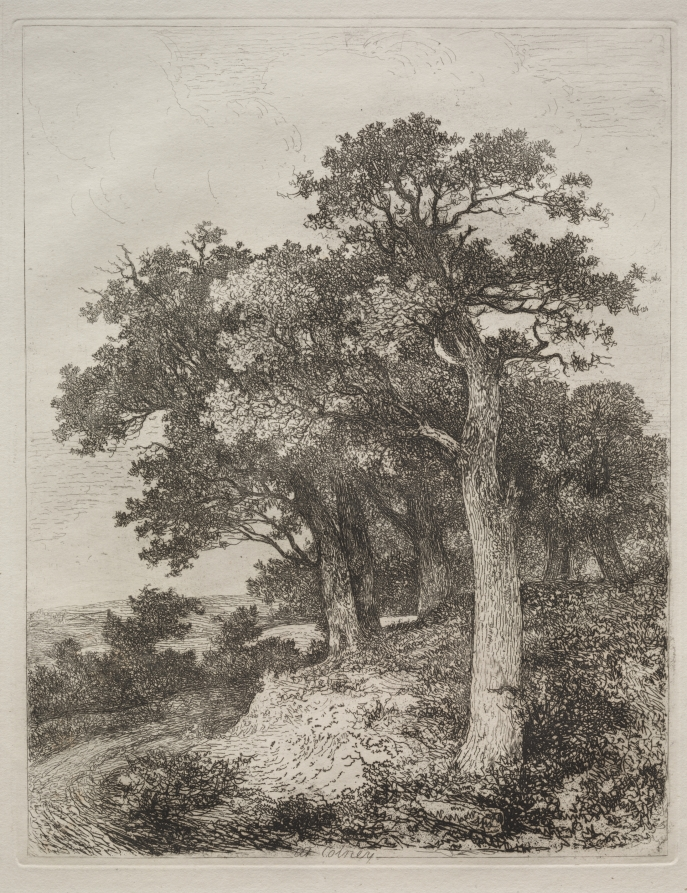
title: At Colney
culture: England, 18th-19th century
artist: John Crome (British, 1768–1821)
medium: etching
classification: Print